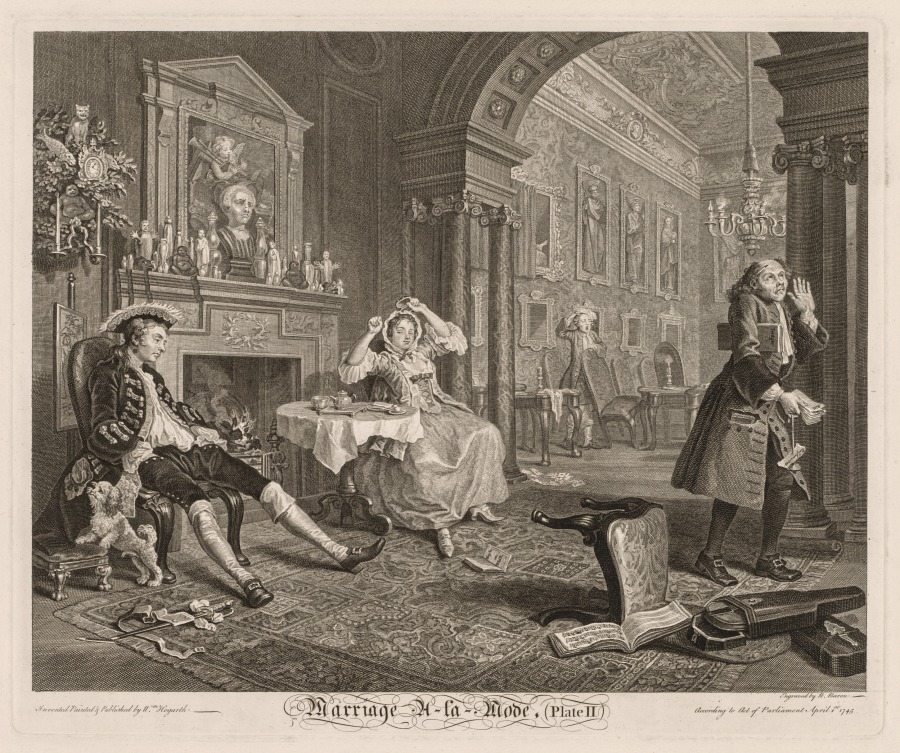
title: The Tête à Tête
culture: England, 18th century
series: Marriage à la Mode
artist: William Hogarth (British, 1697–1764)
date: 1745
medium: etching and engraving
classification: Portfolio